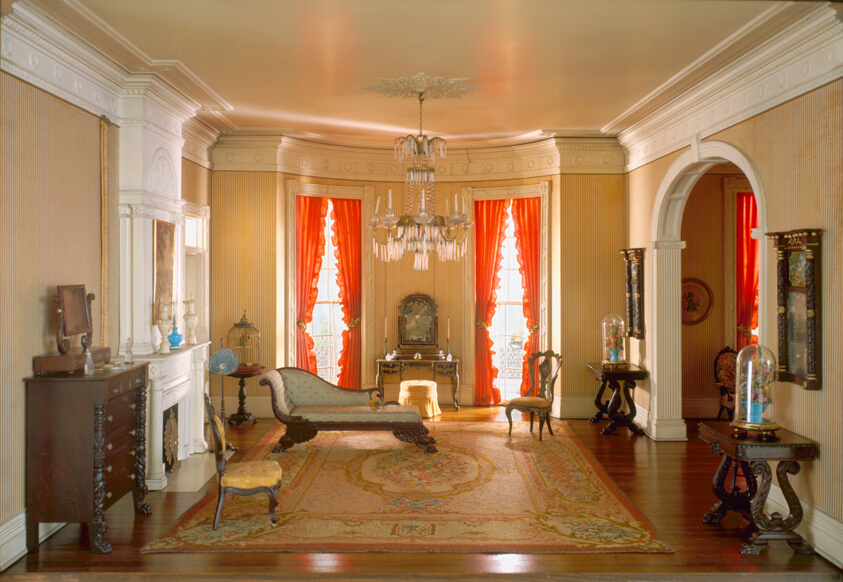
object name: Miniature room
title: A32: Louisiana Bedroom, 1800-50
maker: Designed by Narcissa Niblack Thorne; American, 1882-1966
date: c. 1940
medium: Miniature room, mixed media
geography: United States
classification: miniature; thorne rooms